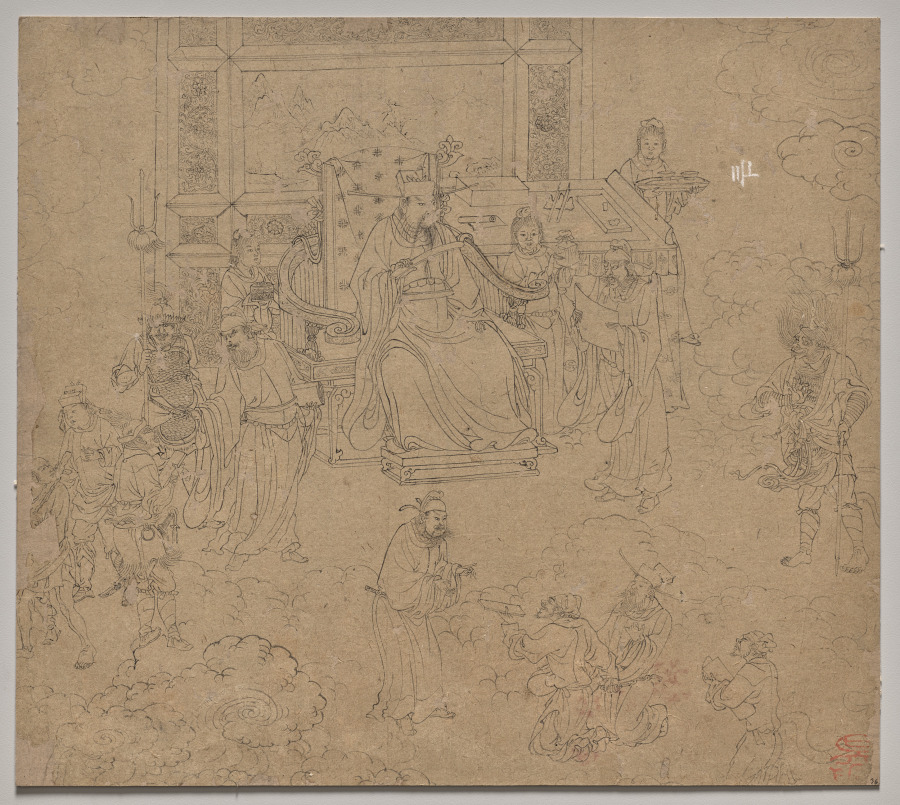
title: Album of Daoist and Buddhist Themes: Kings of Hells: Leaf 36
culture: China, Southern Song dynasty (1127-1279)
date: 1200s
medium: Album, ink on paper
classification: Painting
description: This extraordinary album has 50 paintings on a variety of religious subjects. They were likely created by several master craftsmen to share with studio apprentices as models for fulfilling commissions. The Jade Emperor and the Daoist pantheon make up the first 26 leaves. The next 14 leaves portray the Buddhist Ten Kings of Hell administering punishments to the dead. The third section, called “Clearing the Mountains,” features divine soldiers, led presumably by the deity Erlang Shen 二郎神, fighting undesirable creatures.